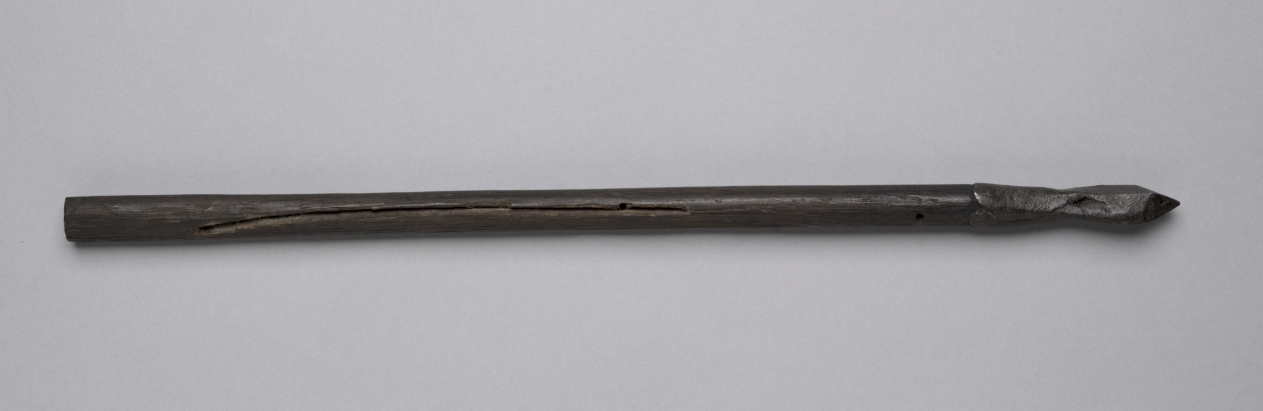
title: Crossbow Bolt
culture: Germany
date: 1500s-1600s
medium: wood, leather, steel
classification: Arms and Armor